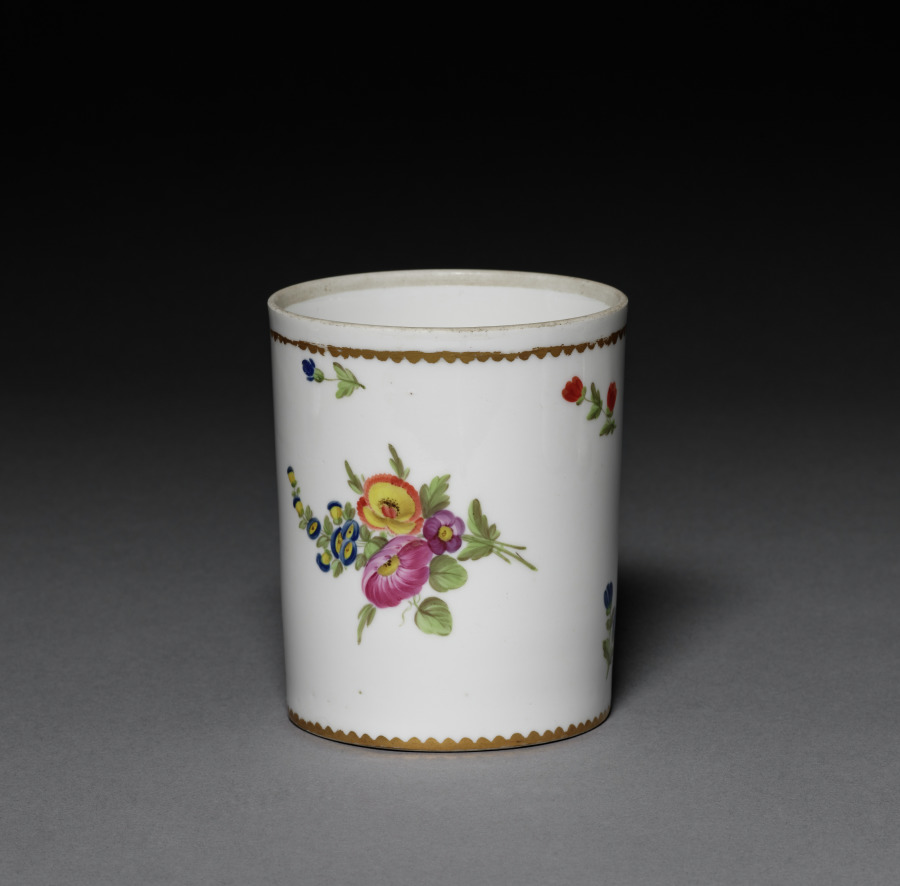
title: Jar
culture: France, 18th century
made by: Faubourg Saint-Denis (French)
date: c. 1775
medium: porcelain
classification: Ceramic